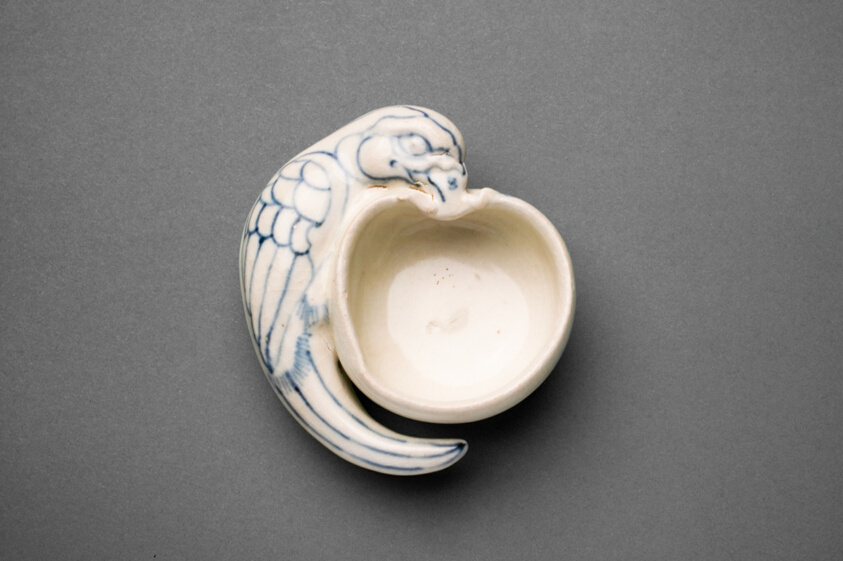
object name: Decorative Arts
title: Bowl with Relief Parrot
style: Southeast Asian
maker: Vietnam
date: 15th century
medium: Porcelain with blue underglaze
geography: Vietnam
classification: bowl; dish (vessel); decorative arts